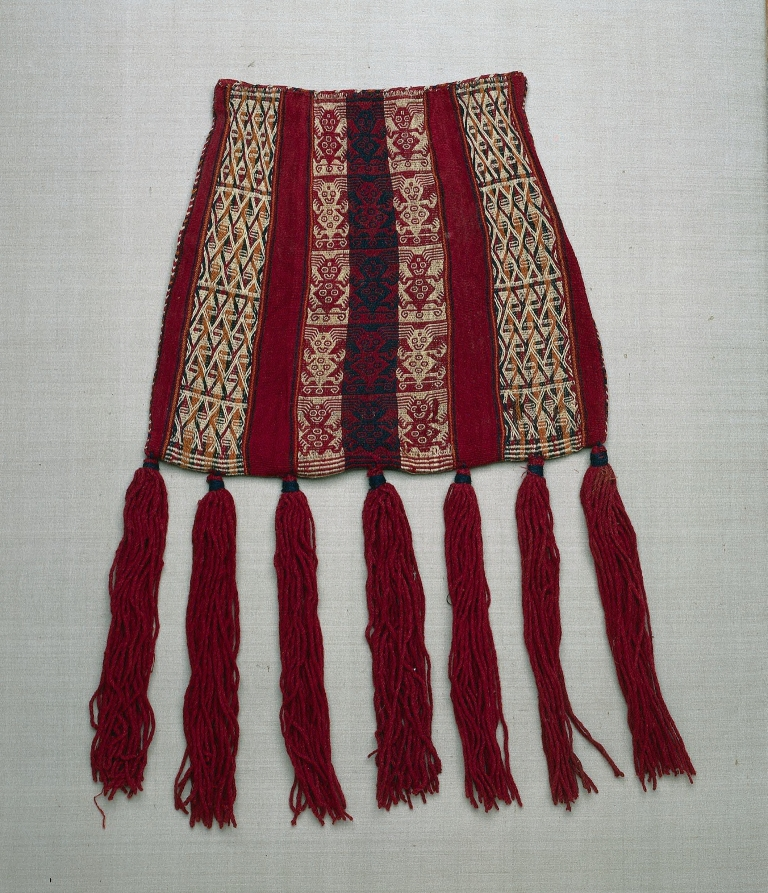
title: Trapezoidal Bag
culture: Peru, South Coast, Arica culture, or Chile, North Coast, 13th-15th century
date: 1200–1400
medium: alpaca wool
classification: Textile